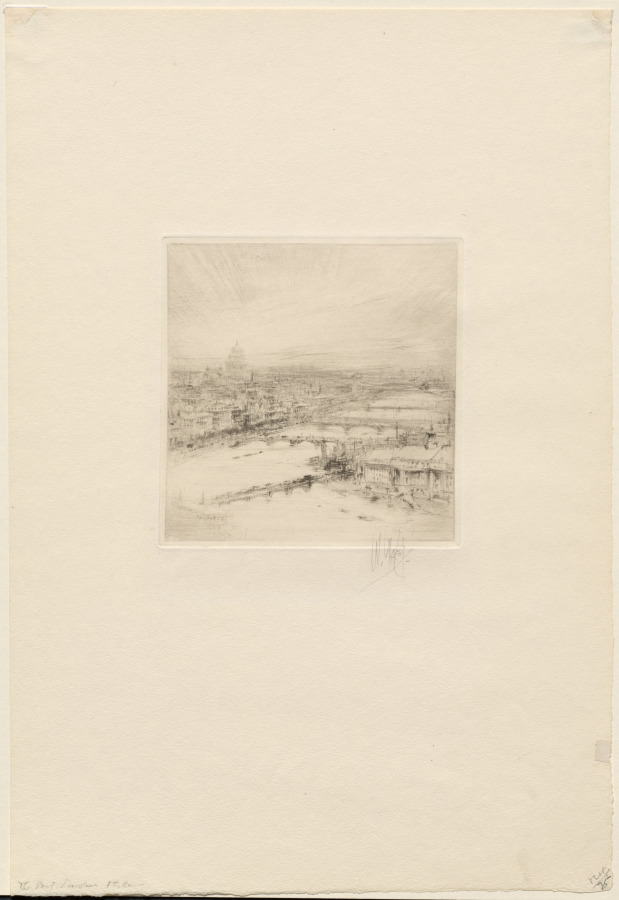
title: London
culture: England, 20th century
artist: William Walcot (British, 1874–1943)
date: 1920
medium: etching in brown, and drypoint, plate tone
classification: Print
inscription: Lower right, in graphite: W. Walcott